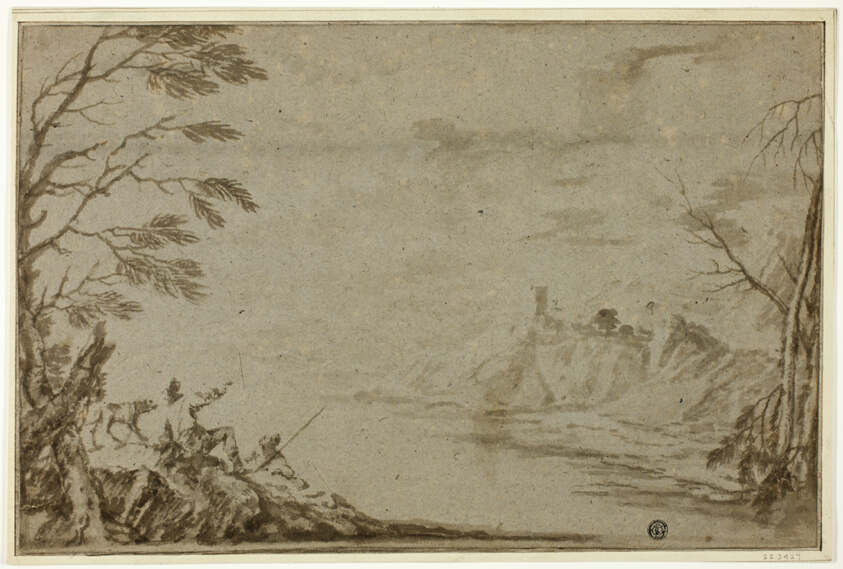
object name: Drawing and Watercolor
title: Hunters with Dog Beside River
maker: Attributed to Marco Ricci (Italian, 1676-1729); or after Salvador Rosa (Italian, 1615-1673); or Richard Wilson (English, 1714-1782)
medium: Brush and brown wash on gray laid paper, laid down on ivory laid card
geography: Italy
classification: ink or chalk wash; drawings (visual works); prints and drawing